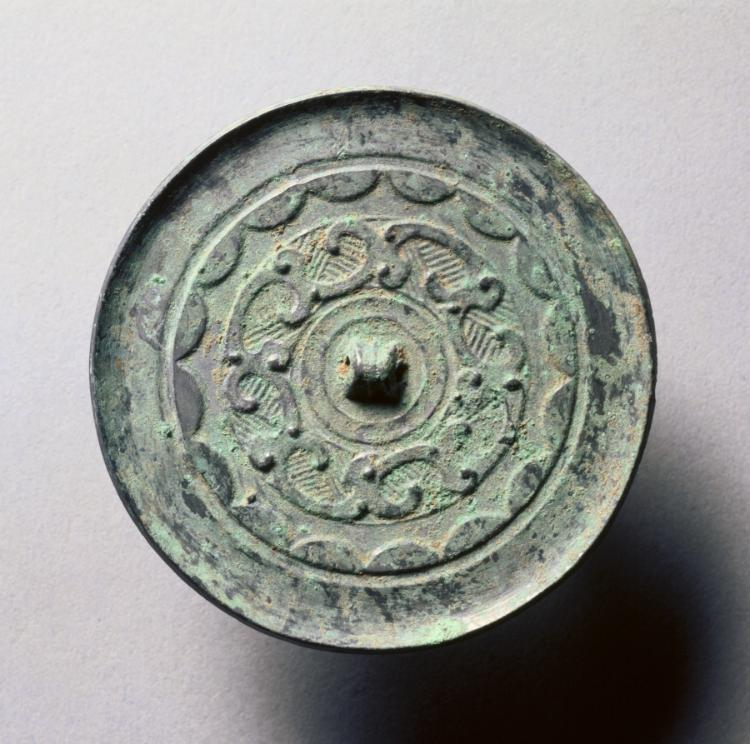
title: Mirror with Continuous Arcs and Quasi-Dragons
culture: China, Western Han dynasty (206 BCE–8 CE)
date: late 300s BCE–50 CE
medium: bronze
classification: Metalwork